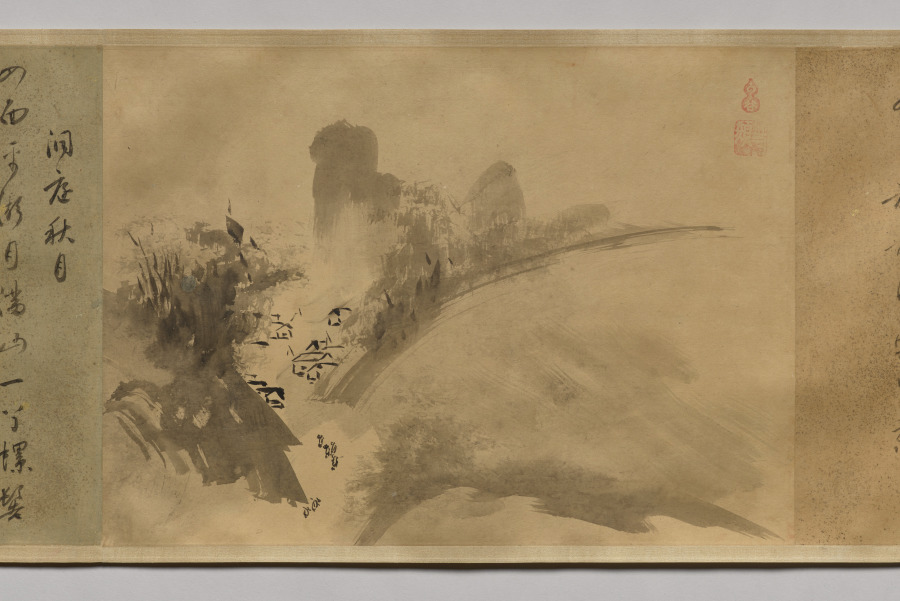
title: Poems and Pictures of the Eight Views of Xiao-Xiang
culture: Japan, Momoyama period (1573–1615)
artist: Unkoku Tōgan (Japanese, 1547–1618)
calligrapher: Inkei Gentetsu (Japanese, 1562–1612)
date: 1605–12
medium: Handscroll; ink on paper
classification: Painting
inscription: Each painting sealed with red gourd-shaped seal reading Unkoku (雲谷) and a square seal reading Tōgan (等顔).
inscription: Each painting prefaced with a titled poem on the Eight Views of Xiao-Xiang by Yujian Ruofen (active late 13th century) inscribed by Japanese Buddhist monk Inkei Gentetsu (1562–1612).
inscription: 右寫玉㵎之筆勢／雪舟末葉等顔筆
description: Unkoku Tōgan brushed these scenes using the splashed-ink technique associated in Japan with the Chinese monk Yujian Ruofen (active late 1200s). Xiao-Xiang refers to the region in present-day Hunan province, where the Xiang River and its tributaries converge. Each of the eight views evokes a time of day or season. The earliest surviving series of Xiao-Xiang paintings is by Wang Hong (active mid-1100s), but textual evidence tells us the theme appears earlier. It was later adopted in Japan and Korea, as seen here. The poems were inscribed by Inkei Gentetsu, the third abbot of the Rinzai Zen temple Tōshunji, Japan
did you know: The “Tō” of Tōgan comes from the name of painter Sesshū Tōyō (1420–1506).